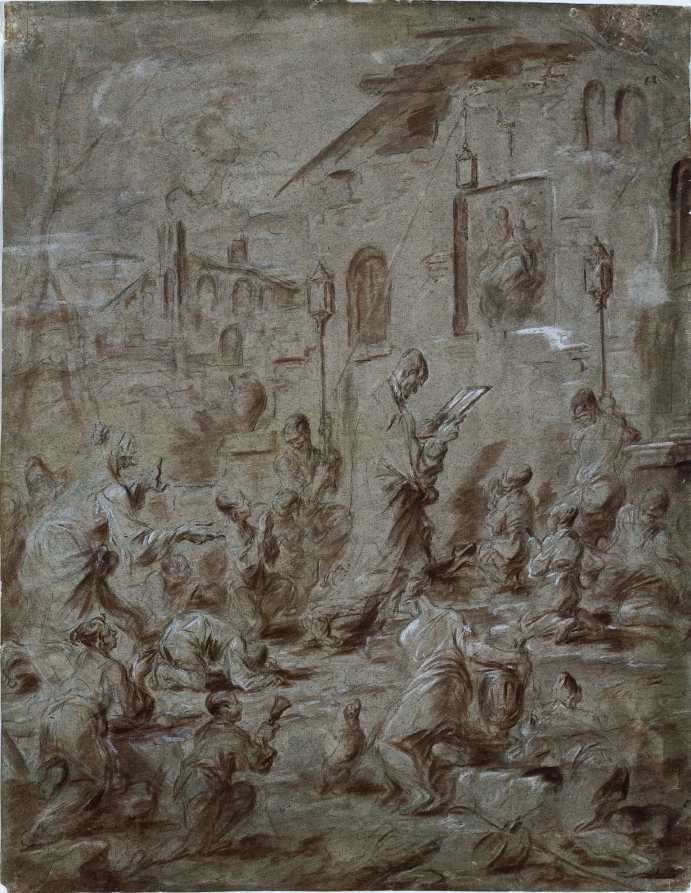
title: Worshippers at a Street Shrine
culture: Italy, 18th century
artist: Alessandro Magnasco (Italian, 1667–1749)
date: 1730/40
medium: brush and red-brown ink and black chalk, heightened with lead white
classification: Drawing